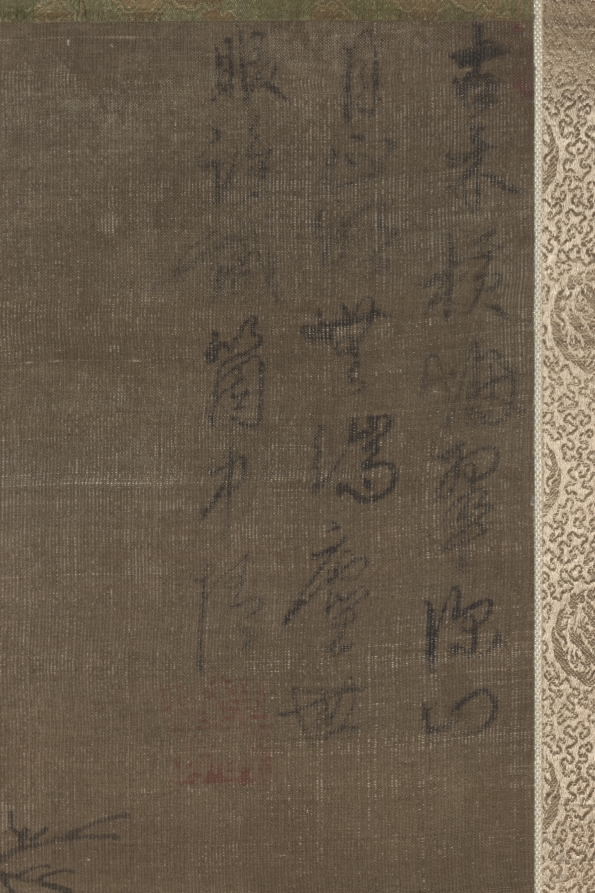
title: Liu Haichan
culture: China, Yuan dynasty (1271-1368)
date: 1300s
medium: Hanging scroll; ink and color on silk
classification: Painting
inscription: Inscribed in upper right corner: The old tree has its green shrouded in mist/ In the depth of the mountain the moon is bright/ By no means could the eyes of the dusty world/ Understand these particular feelings. Shan-yüeh tao-jen [seal] Shan-yüeh (?)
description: Liu Haichan is a Daoist immortal sometimes included in the Eight Immortals. He is often shown as a young man wearing bangs across his forehead. He was said to have lived during the Five Dynasties period (907–979) and left his position as a grand councilor to become a hermit. Usually depicted carrying a string of coins and accompanied by a three-legged toad, Liu Haichan became a god of wealth and his toad symbolizes wealth as well. In this scroll, Liu is teasing the three-legged toad with a string of coins tied to his waist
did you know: Because the immortal Liu Haichan is usually depicted with bangs, his eponym, liúhǎi 劉海, means "bangs" in Chinese.